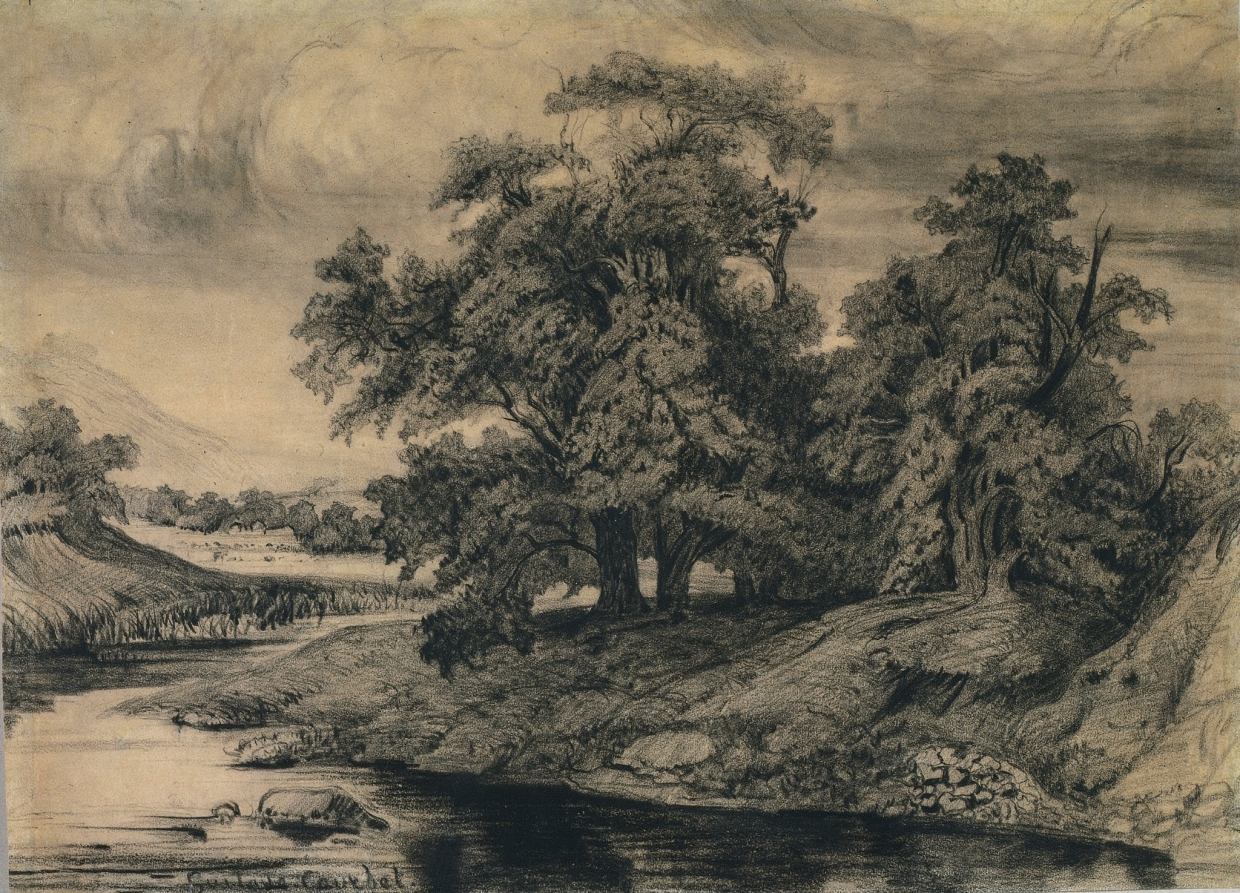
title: Landscape with Large Trees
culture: France, 19th century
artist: Gustave Courbet (French, 1819–1877)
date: c. 1870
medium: black chalk with stumping on brown wove paper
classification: Drawing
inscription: signed, lower left, in black crayon: Gustave Courbet.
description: The relatively few drawings that Gustave Courbet produced include the group of landscapes to which this example belongs. Rather than referencing a specific place, it combines a wide range of source material—tourist destinations the artist visited in Switzerland, his home in the Franche-Comté region, and paintings by Claude Lorrain and other historical landscapists. Courbet began by applying a hazy middletone in charcoal before adding detail with a darker, sharpened stick. Although surely appealing to collectors of the time, such works also had ideological significance, presenting an untouched terrain that suggested independence and freedom.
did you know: The slightly blurred appearance of this drawing recalls a similar effect common in early landscape photography.